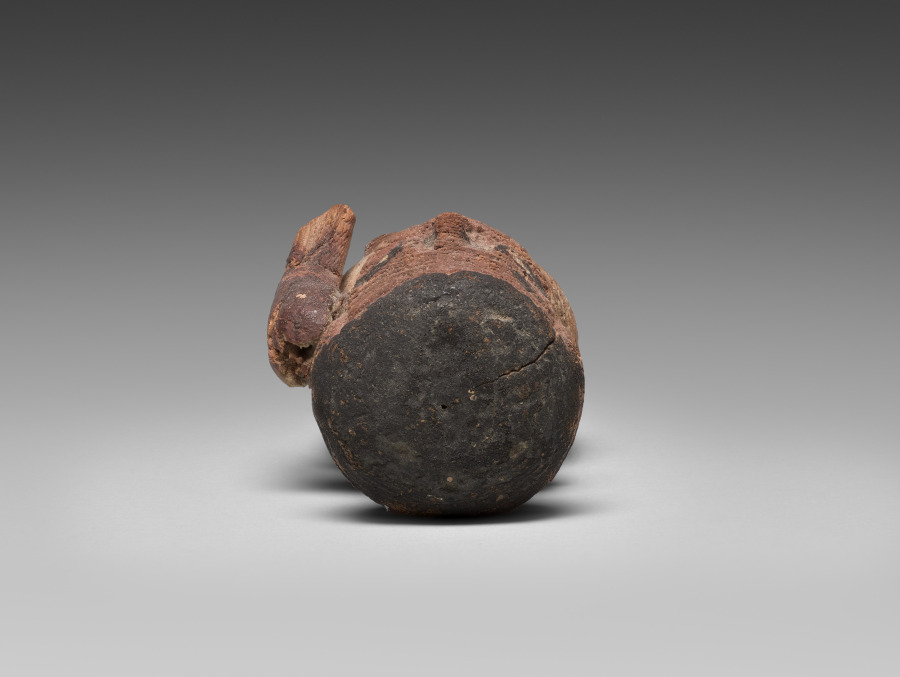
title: Model Figure of a Man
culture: Egypt, Middle Kingdom (2040–1648 BCE), Dynasty 12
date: 1980–1801 BCE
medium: painted wood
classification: Funerary Equipment